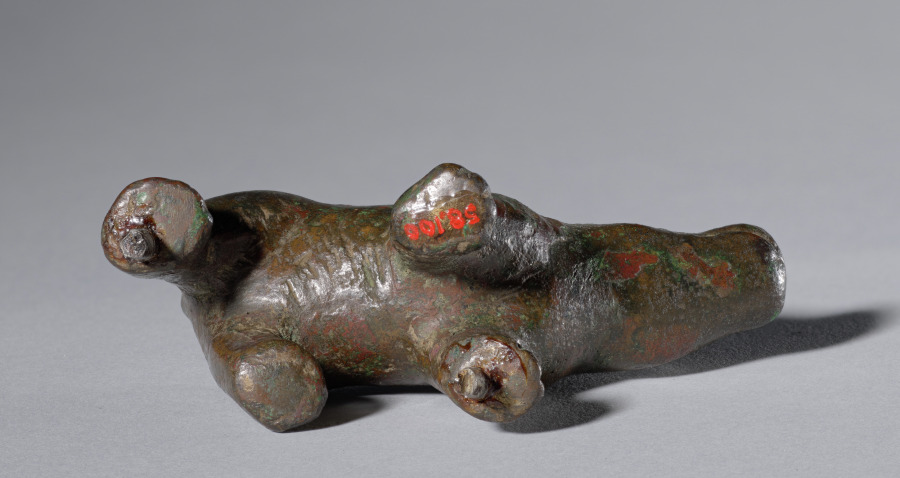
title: Hippopotamus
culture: Italy, Rome, Greco-Roman Period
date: 332 BCE–395 CE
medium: bronze, solid cast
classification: Sculpture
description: This hippopotamus steps forward with its rear left leg lifted off the ground and its head arched upwards. The hippopotamus was a Nilotic animal associated with Egypt and the Nile River that was brought to Rome and put on display in the Colosseum as part of venationes, or wild beast hunts. The rise of “Egyptomania” in the Roman Empire surged under the emperor Hadrian (reigned AD 117–38). Extant Egyptian examples of hippopotamus figurines are less animated and made of materials such as stone or pottery rather than bronze, making the pose and materiality of this object distinctly Greco-Roman.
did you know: The word hippopotamus is a Greek compound word combining “horse” (hippos) and “river” (potamos).